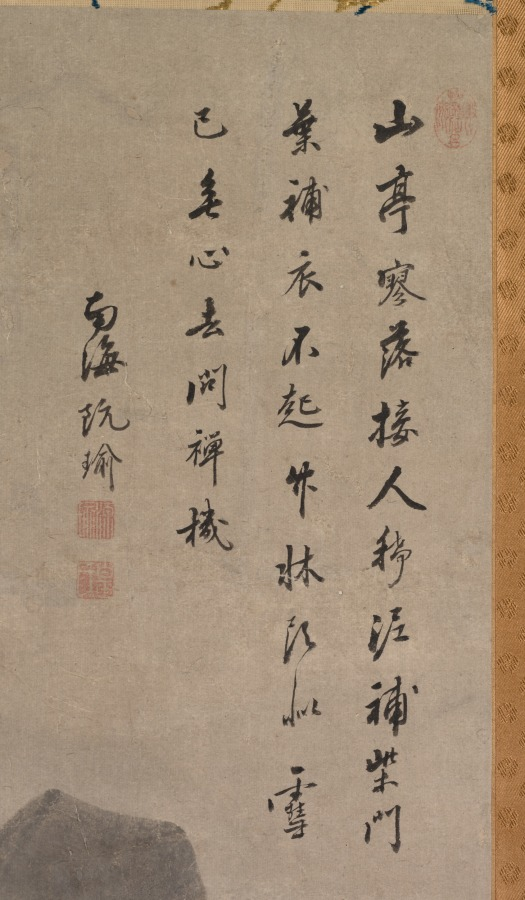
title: Landscape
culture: Japan, Edo period (1615–1868)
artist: Gion Nankai (Japanese, 1677–1751)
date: c. 1700–1751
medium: hanging scroll; ink and color on paper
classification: Painting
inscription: artist's inscription, signature and two seals at upper right corner.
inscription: The mountain pavilion is desolate, visitors are rare./ Mud patches the brushwood gate; leaves patch my clothes./ Rising not from the bamboo bed, my head like snow./ Already without intent, I abandon questions of Zen.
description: A teacher of Confucian ethics, the Chinese philosophical system focused on social harmony and familial responsibility, Gion Nankai was also a painter. Ike Taiga (池大雅) (1723–1776) was among his students. Nankai inscribed this landscape with one of 24 poems for painting subjects composed by the scholar and painter Tang Yin (唐寅) (Chinese, 1470–1524). It reads as follows: The mountain pavilion is desolate, visitors are rare. Mud patches the brushwood gate; leaves patch my clothes. Rising not from the bamboo bed, my head like snow. Already without intent, I abandon questions of Zen.